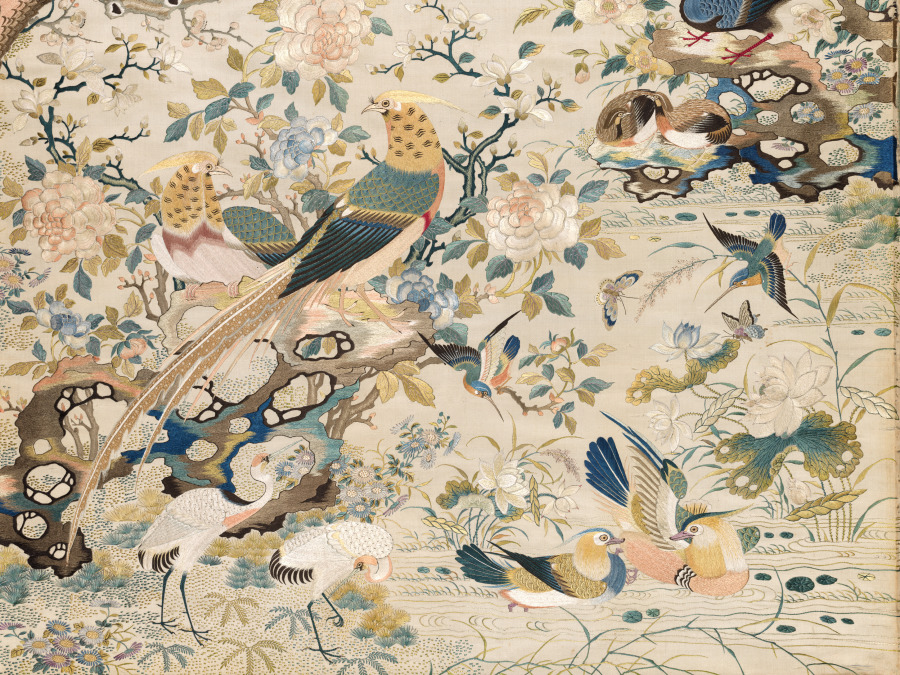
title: A Myriad of Birds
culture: China, Qing dynasty (1644–1911)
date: 1700s–1800s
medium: silk: satin weave with polychrome silk embroidery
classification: Embroidery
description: This embroidered panel, made with extremely fine silk threads, presents a lavishly detailed composition filled with fortuitous imagery. Pairs of birds, including mandarin ducks, peacocks, cranes, swallows, and pheasants, move among flowering trees, ornamental rocks, and aquatic plants, symbolizing harmony, prosperity, and longevity. Cranes stand for longevity, while a pair of mandarin ducks convey wishes for a harmonious marriage. Inspired by the decorative bird-and-flower paintings of the artist Lü Ji, the work prioritizes symbolism over spatial logic. With vibrant colors, meticulous stitching, and fortuitous meaning, the embroidery exemplifies the technical brilliance of Qing dynasty textile art, rivaling the quality of imperial production.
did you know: This magnificent textile, probably executed by a woman, demonstrates the tradition of making embroidered pictures in imitation of paintings.